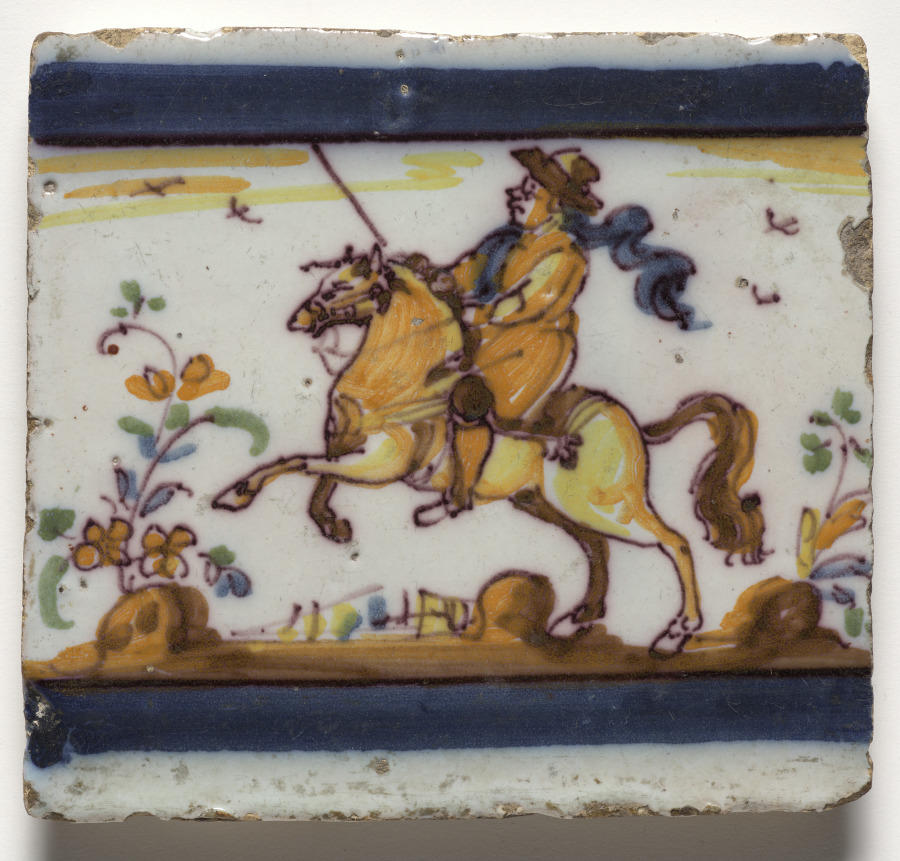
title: Wall Tile–Knight on Horseback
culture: Spain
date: c. 1600s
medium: glazed ceramic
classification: Ceramic